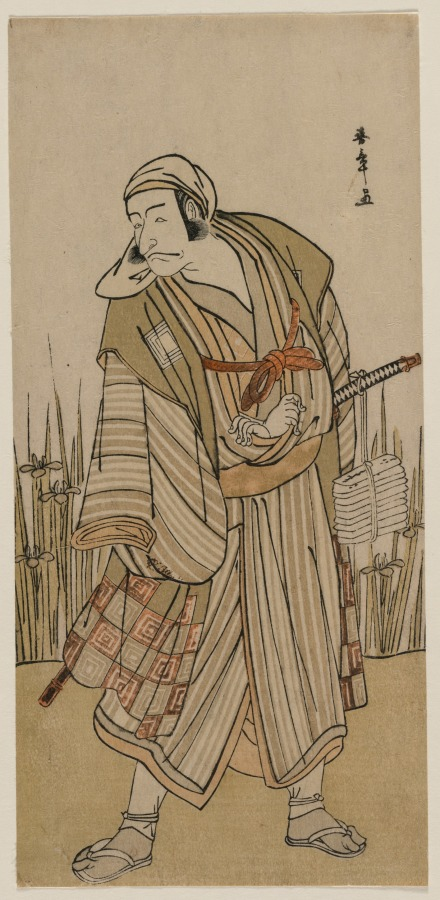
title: Ichikawa Danjuro V as a Traveller Beside a Clump of Iris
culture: Japan, Edo period (1615–1868)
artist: Katsukawa Shunshō (Japanese, 1726–1792)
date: c. 1780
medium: color woodblock print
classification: Print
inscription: Signature: Shunsho ga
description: Shunsho was a well-known painter and printmaker in Edo who dominated the actor print field in his time.